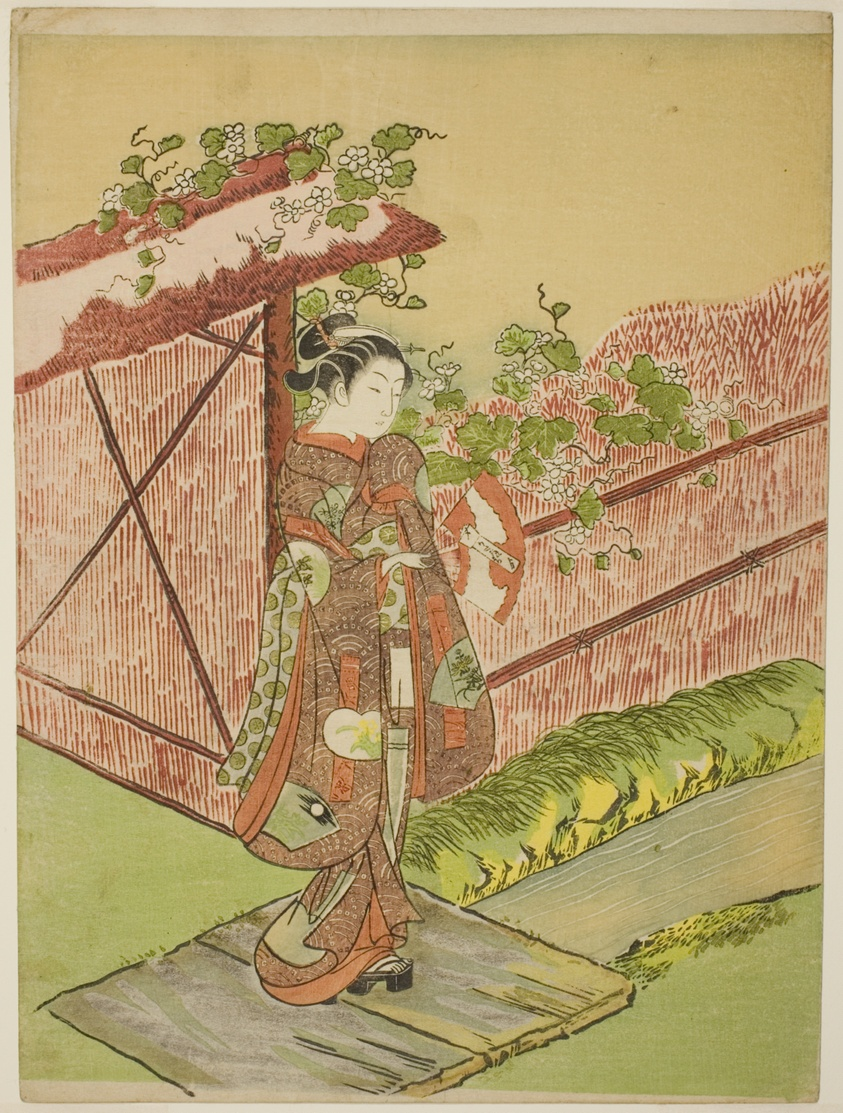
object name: Print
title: Meeting her Lover (parody of the Yugao chapter of "Tale of Genji")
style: Japanese (culture or style)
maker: Suzuki Harunobu 鈴木 春信; Japanese, 1725 (?)-1770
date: c. 1766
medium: Color woodblock print; left sheet of chuban diptych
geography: Japan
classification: woodblock print; print; asian art